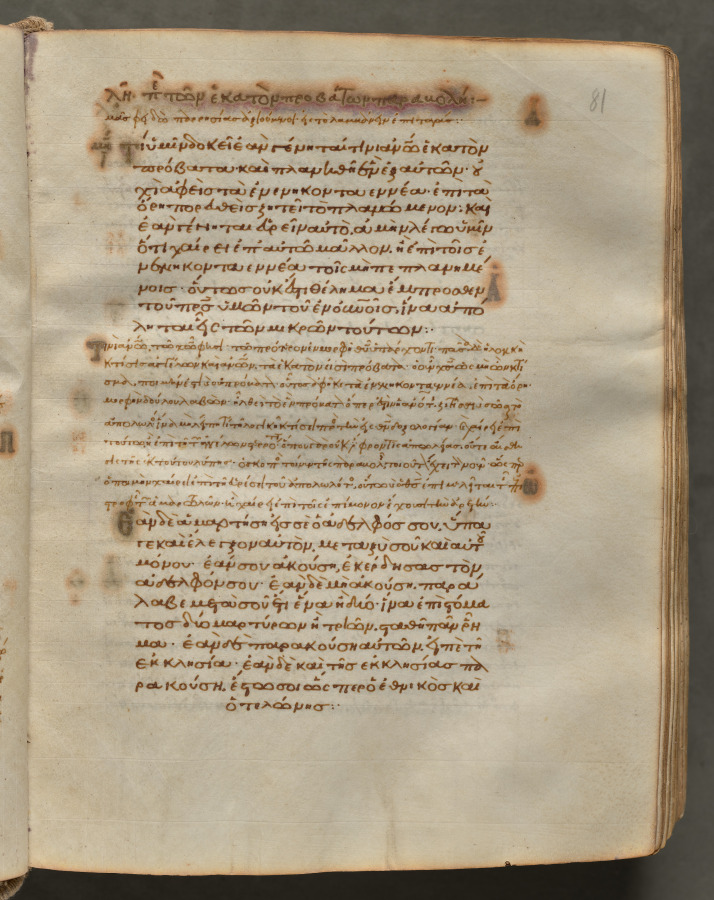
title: Text, folio 81 (recto), from a Gospel Book with Commentaries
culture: Byzantium, Constantinople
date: c. 1000–1100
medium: ink, tempera, and gold on vellum; leather binding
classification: Bound Volume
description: Each of the four gospels in this book opens on a page with brilliantly illuminated borders depicting the author of the text as well as birds-principally peacocks, symbols of the immortality of the soul-and fountains, representing the fountain of life and the salvation of the soul. This volume consists of 428 leaves with texts in Greek. Its level of sophistication suggests that it was probably written and decorated in a monastery in Constantinople.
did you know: Gospel Books were carried in procession through Byzantine churches.